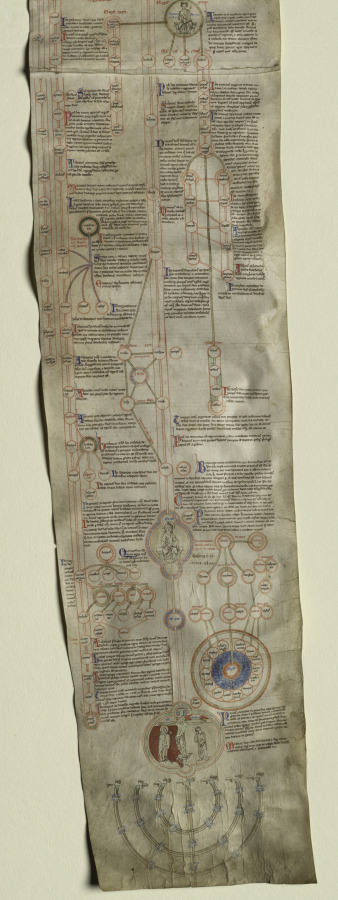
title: Peter of Poitiers's "Compendium Historiae in Genealogia Christi"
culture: England, Canterbury, 13th century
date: c. 1220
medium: ink and tempera on a vellum roll of four membranes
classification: Manuscript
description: This manuscript roll, composed of four membranes formerly stitched together in a continuous roll about nine feet long, has been divided in the middle for easier visibility and study. The text is an abridgment of biblical history focused on the descent of Christ from Adam. It was written by Peter of Poitiers (about 1130–1205), who taught theology and history in Paris and was widely copied. The present roll is an English copy of Peter's text made shortly after his death. Although manuscript rolls were hung on the walls of a classroom as instructional aids to students, some of them have value beyond their textual and historical interest because of the fine quality of their drawings, as seen here. A comparison with Canterbury manuscripts and stained glass of around 1220 is the basis for the attribution to Canterbury. Peter of Poitiers's aim in this project was to assist students prevented from mastering biblical history because of its length and because they were too poor to own books. His text on roll is the briefest possible summary of biblical history. It is arranged in six historical stages, denoting the six ages of the world, as decreed by theological tradition. The first five ages were inaugurated by Old Testament individuals: Adam, Noah, Abraham, David, and Sedecias. The birth of Christ heralded the sixth stage. Beginning at the top of the first membrane, the text consists of brief biographical entries on the ancestors of Christ (Adam, Noah, Abraham, Moses, and David) and other biblical personalities. These extend to the birth of Christ on the fourth membrane, ending with accounts of Hebrew and Roman kings and the Apostles. Each compendium shows the names of the ancestors inscribed within circles, those of direct descent placed vertically in a central column, others scattered in clusters to the right and left. The decoration of the roll consists of a series of medallions of diverse geometrical frames filled with either a figural drawing or a diagram. The style of these pen-and-ink drawings, some illuminated in tempera or tinted with wash, stems from English manuscript and glass painting attributed to the school of Canterbury Cathedral. The style of the museum's illustrations is so close to the stained glass panels made for Trinity Chapel at Canterbury (about 1220) to suggest that an artist active as a glazier in the Cathedral workshop may also have executed the manuscript. In the least, the painter of the roll manuscript was familiar with the style of the painted glass, and on this basis, a date of about 1220 seems appropriate. Additional evidence is supplied by a psalter illuminated at Canterbury shortly before 1220. The figurative scenes in this psalter were apparently illustrated by the same hand that executed the line and wash drawings in the museum's roll.